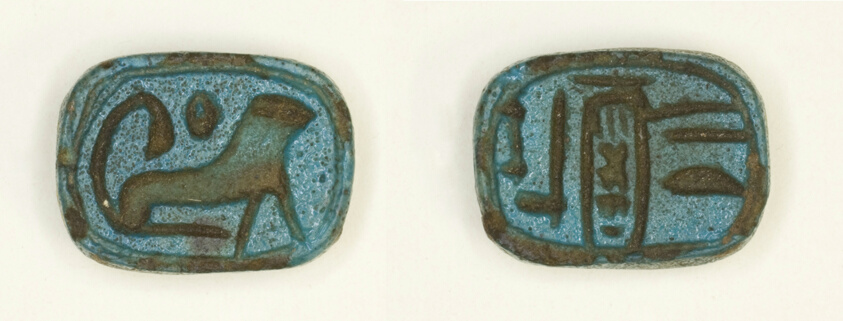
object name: Costume and Accessories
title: Plaque: The Good God, Lord of the Two Lands, Menkheperure (Thutmose IV)/lion with round sign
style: new kingdom, ancient, eighteenth dynasty, egyptian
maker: Egyptian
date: New Kingdom, Dynasty 18, reign of Thutmose IV (1400–1390 BCE)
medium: Ceramic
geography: Egypt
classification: amulet; ancient art; costume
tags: Hieroglyphs, sphinxes, pharaohs, kings, king, cartouches